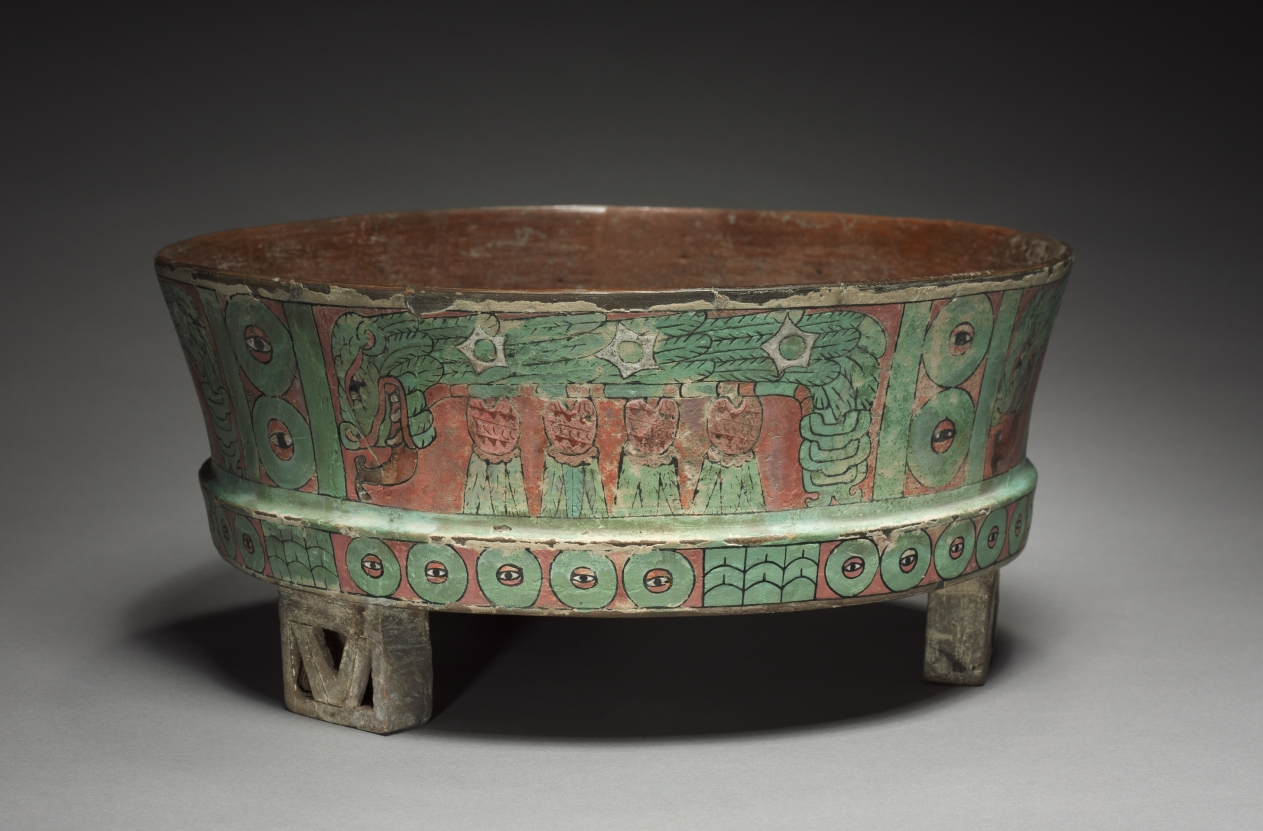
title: Basin with Feathered Serpent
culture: Central Mexico, Teotihuacán style, Classic period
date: 400–550 CE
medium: earthenware, stucco, pigment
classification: Ceramic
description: The serpent covered with the green feathers of the tropical quetzal bird is an image of verdant, bountiful nature and life. It also may be a symbol of rulership, thus linking rulers to cosmic forces and the natural order. Four human hearts lie beneath the serpent on this unusually large basin, suggesting that sacrifice stimulates nature’s fruitfulness.